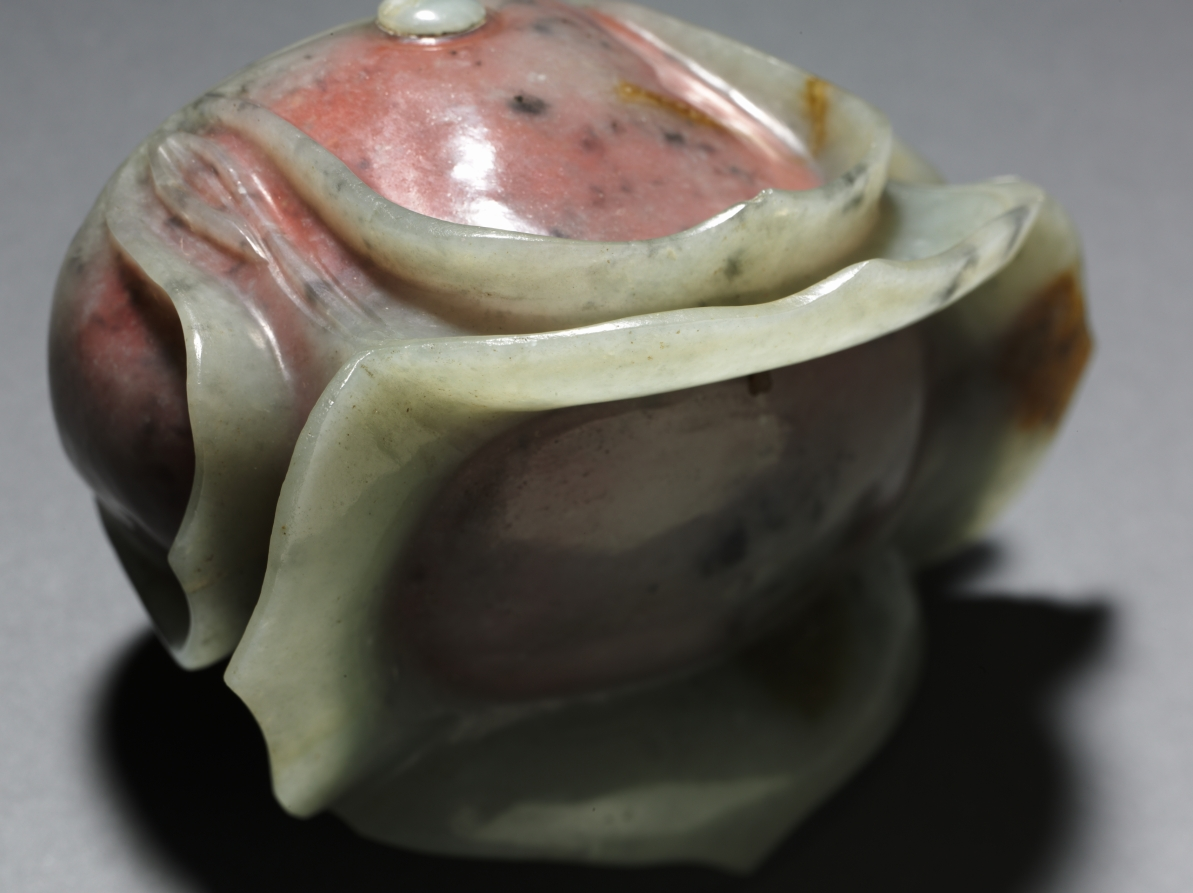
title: Daoist Cap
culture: China, Song dynasty (960-1279) - Yuan dynasty (1271-1368)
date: 960–1279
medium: grayish-green jade with brown and black markings; interior with pink pigment and gold inlays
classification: Jade